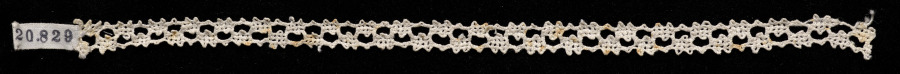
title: Lace Insertion (no selvage)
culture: Italy, Venice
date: 1540–60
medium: Bobbin lace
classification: Lace